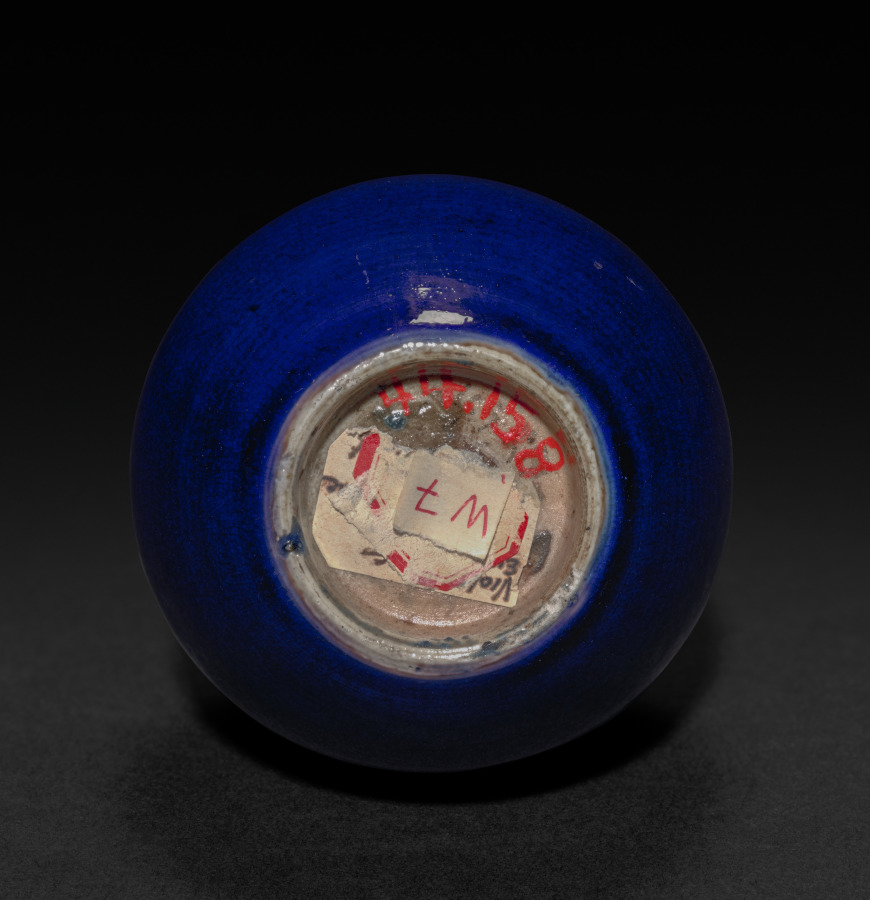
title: Bottle-Shaped Vase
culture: China, Qing dynasty (1644–1911), Qianlong reign (1736–95)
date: 1736–95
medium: porcelain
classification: Ceramic